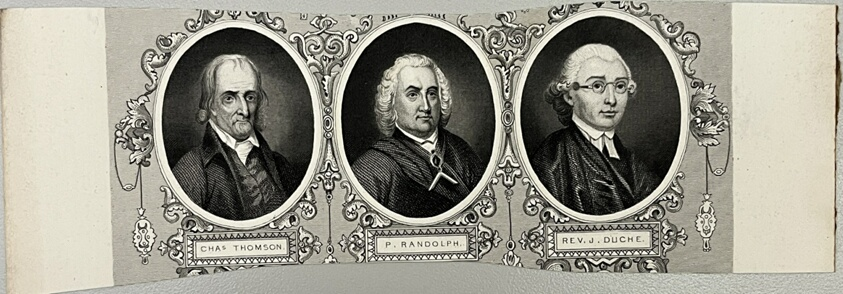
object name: Print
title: Fragments of portraits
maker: Artist Unknown (Likely American or British, 19th century)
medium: Steel engraving on paper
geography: United States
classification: reproduction; print; prints and drawing